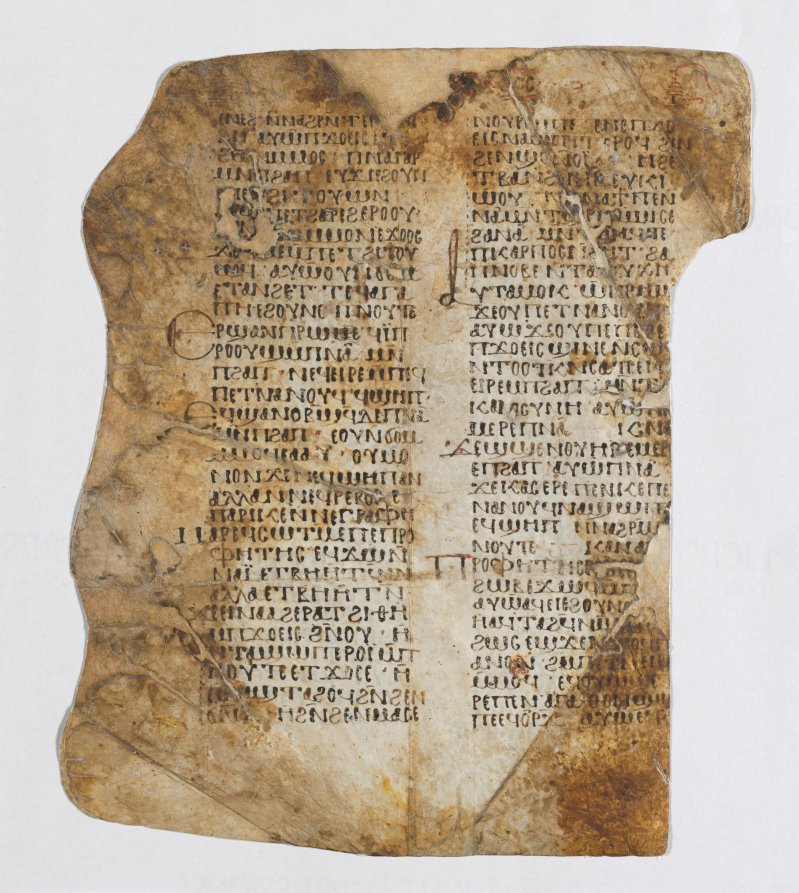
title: Leaf from a Christian Homily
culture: Egypt, Coptic period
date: 500s-600s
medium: ink on vellum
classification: Manuscript